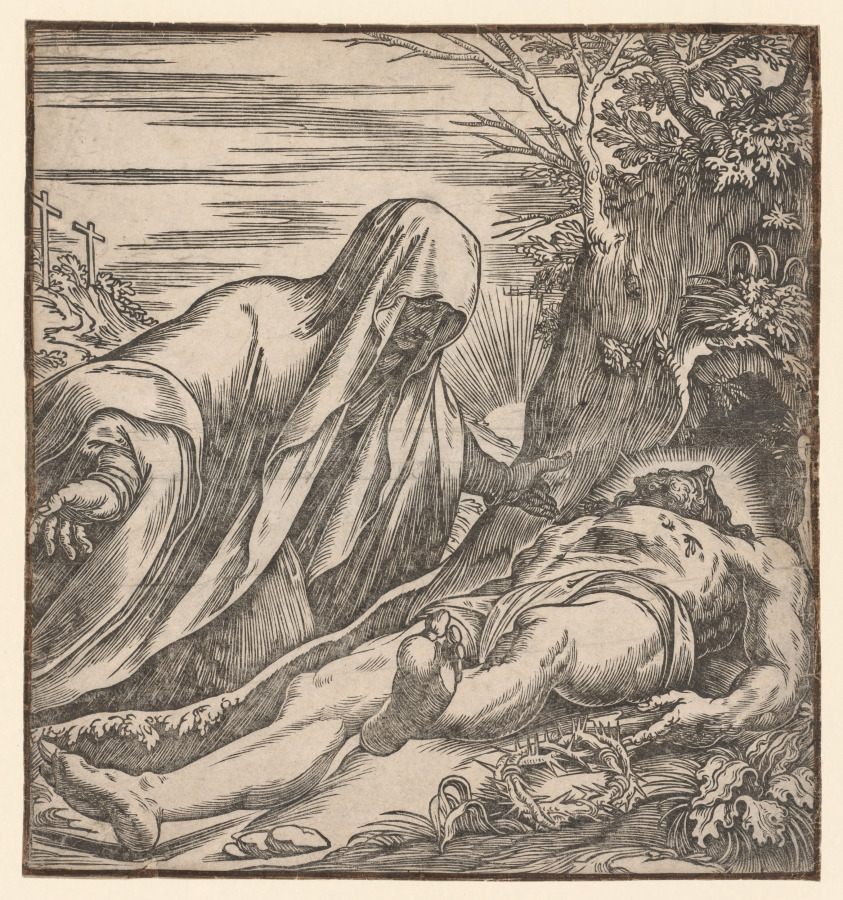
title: Lamentation over the Body of Christ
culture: Italy, 16th century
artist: Giuseppe Scolari (Italian)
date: late 1500s–early 1600s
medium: woodcut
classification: Print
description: Venice was an important center for the production of woodcuts during the 1500s. Titian (1488-1576), the celebrated Venetian painter, exerted tremendous influence on the graphic arts. His vibrant, monumental woodcut designs inspired generations of artists, including Giuseppe Scolari, who is known today only through a handful of woodcuts. The dramatic composition and the bold linear treatment are characteristic of Scolari's style.